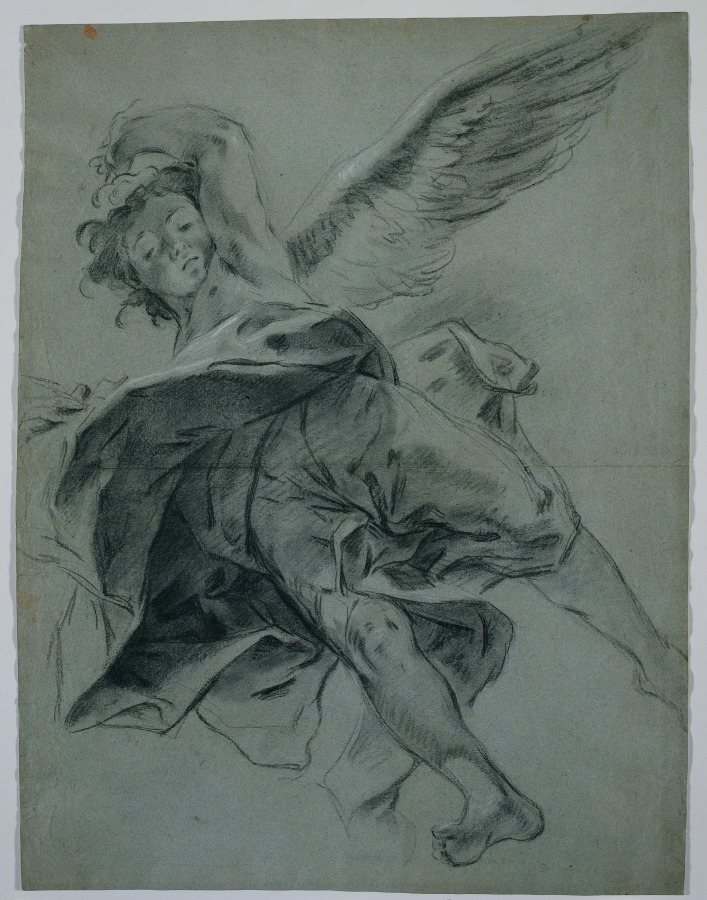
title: A Flying Angel (recto); Studies of Hands Playing Instruments (verso)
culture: Italy, Venice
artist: Giovanni Battista Piazzetta (Italian, 1682–1754)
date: 1723–27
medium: black chalk heightened with traces of white chalk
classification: Drawing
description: This drawing was completed in preparation for the most prestigious religious commission of Giovanni Battista Piazzetta’s career, the ceiling painting of the Glory of St. Dominic for the church of SS. Giovanni e Paolo in Venice. Both the finished painting, which depicts St. Dominic’s arrival in heaven amid a thundery vortex, and Piazzetta’s study for the angel, who carries St. Dominic on a cloud, depart from Venetian tradition. To execute this airborne subject, he likely drew from wax or clay models suspended in midair in order to study the illusionistic di sotto in su (from below to above) perspective and the play of light found on the angel’s shadowed form. He worked out the angel’s twisting pose, imbuing it with a lively sense of movement, and accentuated the drapery’s folds with heavy lines as though considering their visibility from afar. There are only slight changes in the angel’s pose between this drawing and the completed painting. As few of Piazzetta’s preparatory studies for paintings exist, Cleveland’s sheet offers rare insight to the artist’s working methods.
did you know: The Venetian blue paper (carta azzurra) of this sheet was the preferred medium for preparatory drawings among artists in Venice at the time this drawing was made.